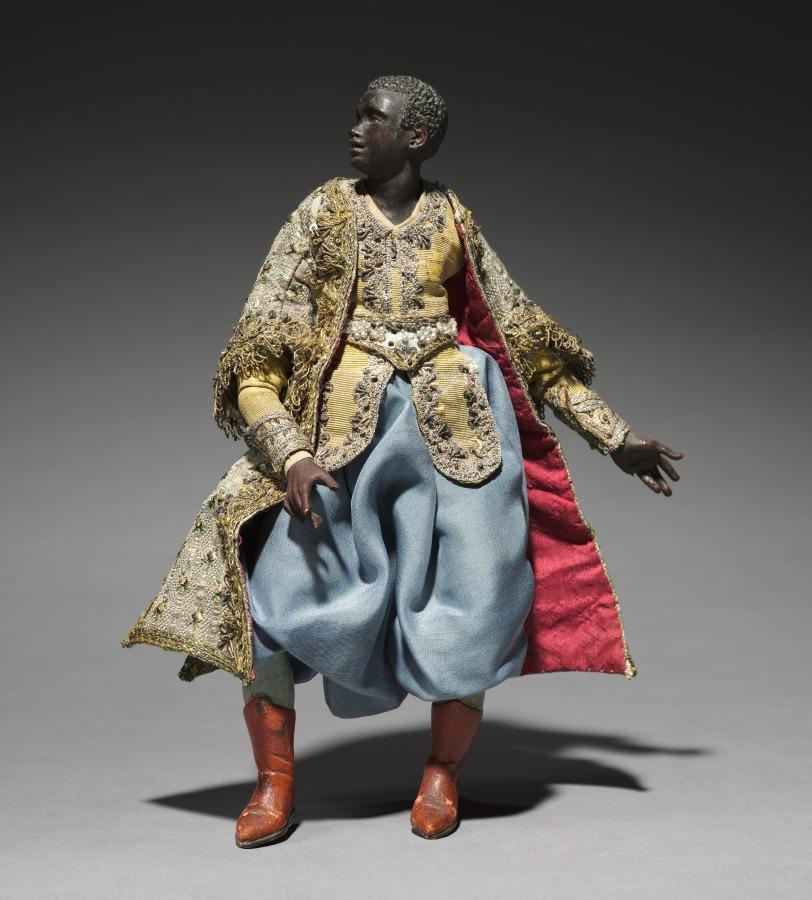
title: Figure from a Crèche: Attendant of the Magi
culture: Italy, Naples, late 18th-early 19th century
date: 1780–1830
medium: painted wood and terracotta with various textiles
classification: Sculpture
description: The practice of creating scenes of the Nativity for the home dates from the early 1700s in Italy, where people began to set up doll-like figures of about a foot or less in height. The custom was particularly popular in Naples around 1800, where crèche scenes (crèche means cradle, or crib) included many figures, whose heads and hands of painted terracotta, stuffed cloth bodies, and clothing adapted from contemporary local costumes gave them an amazingly realistic character. Representations of the birth of Jesus can be traced to the first few centuries of Christianity. Both living creatures and sculptural depictions of them were used from early times. By the late Middle Ages it was customary to create life-size figures of wood or stone, naturalistically painted, to represent the characters who participated in the events of Jesus's early life. These sculptures were then arranged in scenes illustrating one or both of the most important of these events, the Adoration of the Shepherds and the Adoration of the Magi—the three kings from the east who came to pay homage to the Christ child. Used in churches, these large figures were especially popular in Italy, Central Europe, Spain, and Portugal.